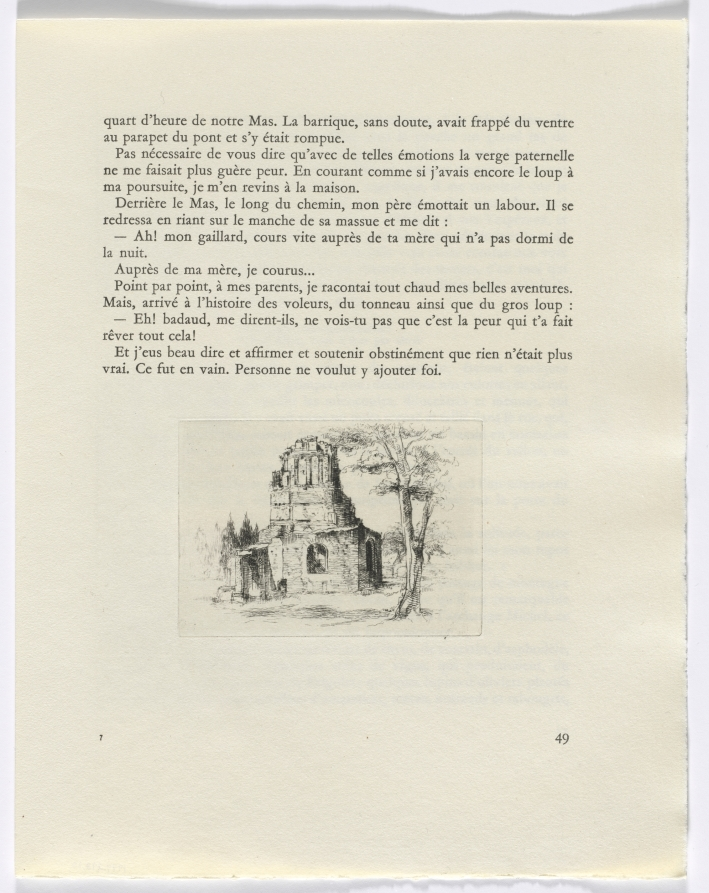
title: Frédéric Mistral: Mémoires et Recits by Frédéric Mistral: ruin (page 49)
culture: France, 20th century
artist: Auguste Brouet (French, 1872–1941)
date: 1937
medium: etchings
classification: Portfolio